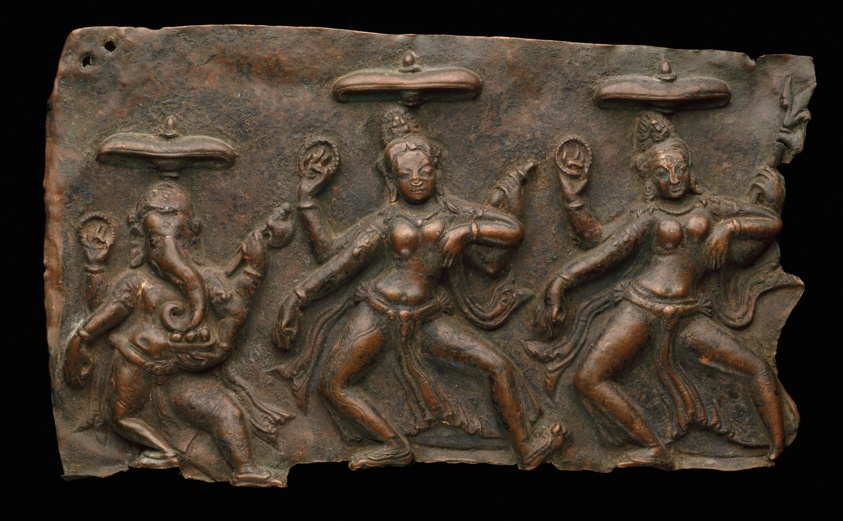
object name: Sculpture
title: Fragment of a Plaque with Dancing Ganesha and the Mother Goddesses Brahmani and Maheshvari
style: Himalayan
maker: Nepal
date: c. 10th/11th century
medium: Copper repoussé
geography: Nepal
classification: copper; metal; sculpture; asian art